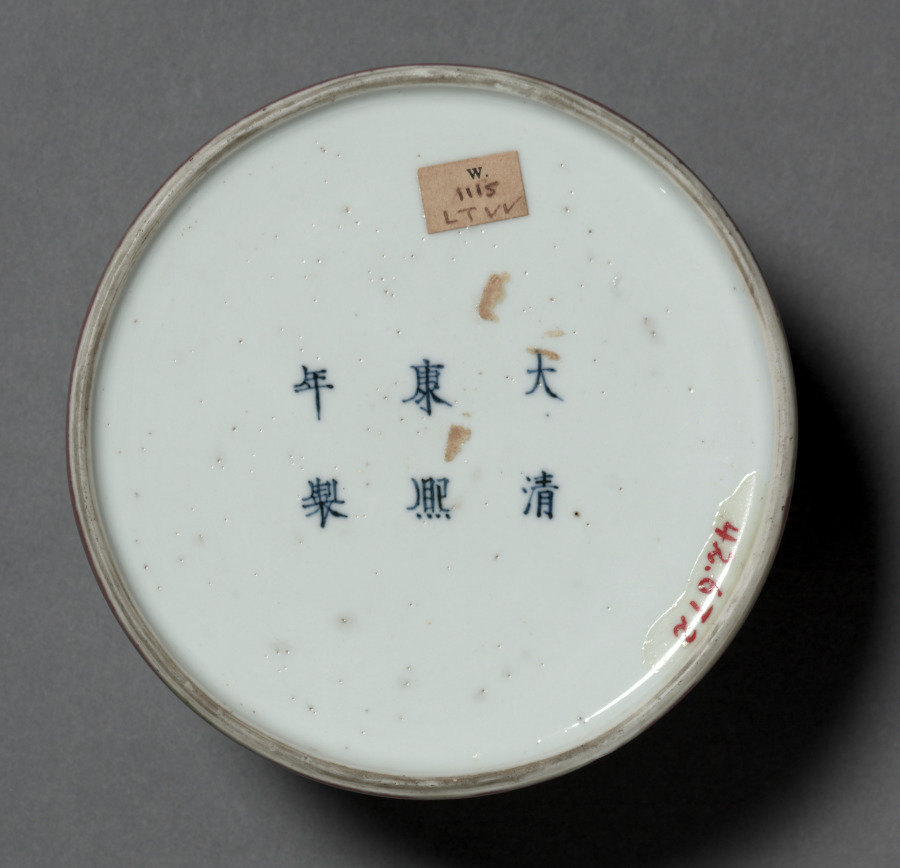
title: Water Pot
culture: China, Jiangxi Province, Jingdezhen, Qing dynasty (1644–1911), Kangxi period (1662–1722)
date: 1662–1722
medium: porcelain with "peach bloom" glaze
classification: Ceramic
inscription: 大清康熙年制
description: The "peach-bloom" glaze developed during the Kangxi era has been described as "drunken with beauty." The water pot's glaze is in shades ranging from red to grayish rose. The interior and base are covered in white glaze.